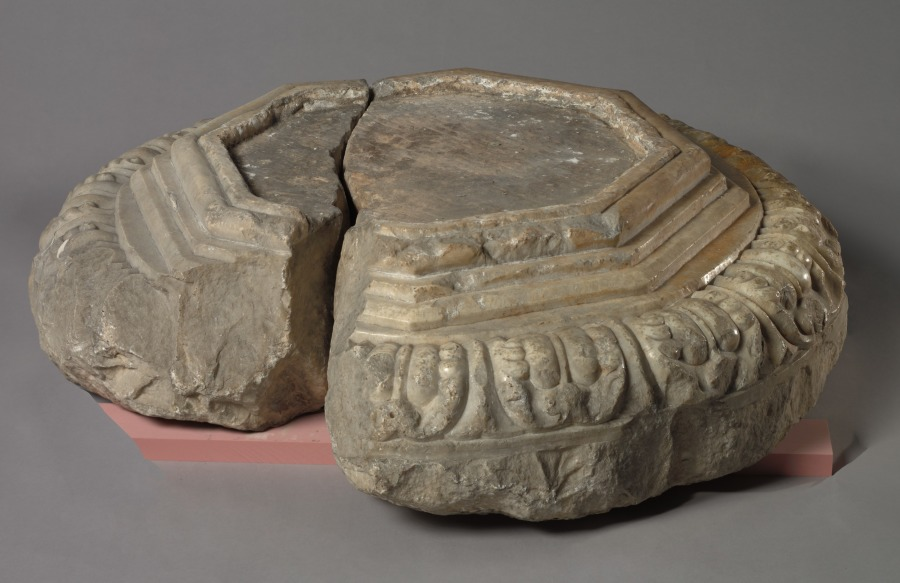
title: Fang Xuanling Pedestal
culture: China, Tang dynasty (618-907)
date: 647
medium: marble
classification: Sculpture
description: This double lotus pedestal exhibits the rich, ornate style of early Tang sculpture. It was commissioned by the Duke of Liang, Fang Xuanling (578–648), for the blessing of his second son and daughter-in-law, the Tang imperial princess of Gaoyang. The iconography and inscription suggest that it originally went with a statue, now missing, of Shakyamuni, the historical Buddha, instead of Amitayus. Today the pedestal is topped with Amitayus, the Buddha of Infinite Life, seated in meditation. Although the pedestal was not made with the statue, the combination is faithful to the original artistic conception.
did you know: In front, the top layer of the pedestal has an abstract curvilinear motif suggesting drapery; the rear is carved with a flower-and-leaf motif.